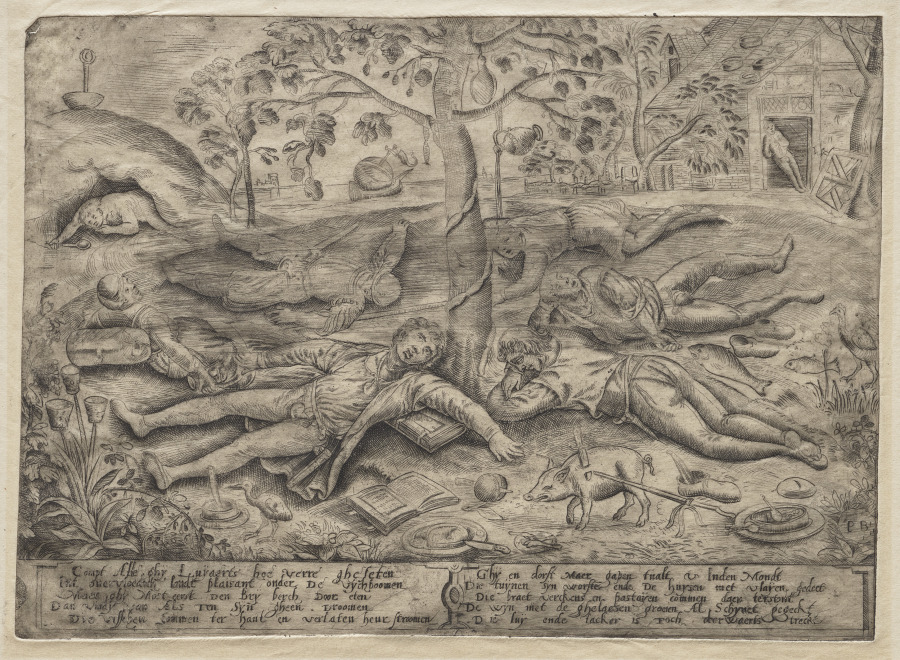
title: Gluttony (Land of Cockaigne)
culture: Flanders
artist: Peeter Baltens (Flemish, 1526/28–before 1584)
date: 1560s (later restrike)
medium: engraving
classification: Print